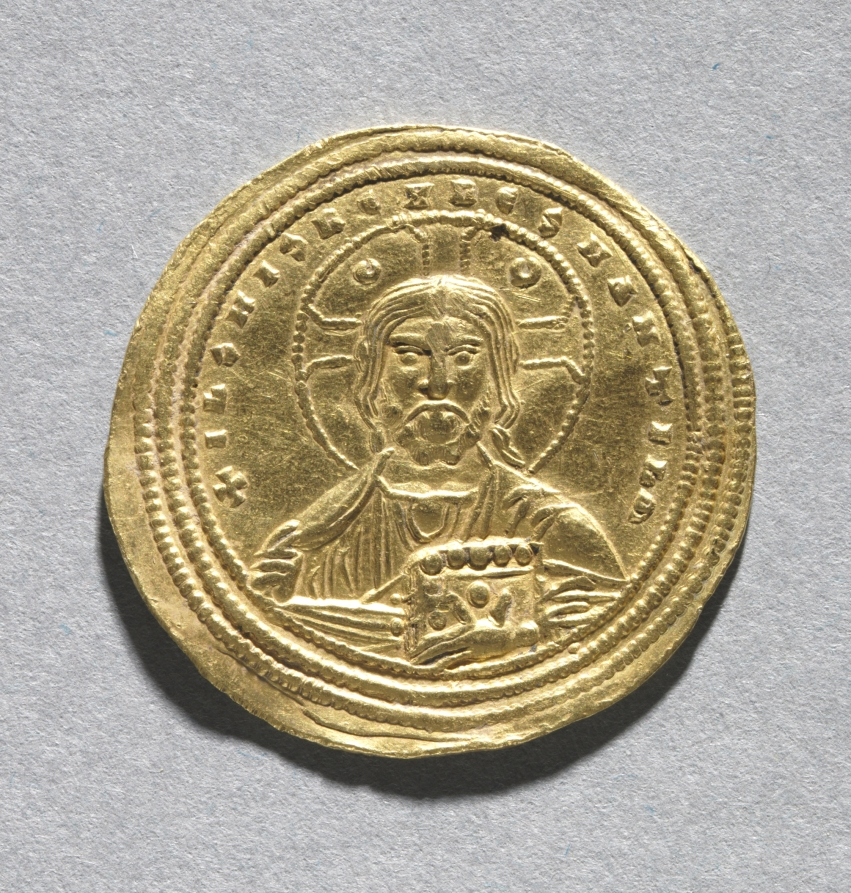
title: Nomisma with Basil II Bulgarotonos and His Brother Constantine VIII (obverse)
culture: Byzantium, Constantinople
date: 977–1025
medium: gold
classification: Coins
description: The vast number of surviving Byzantine coins attests to the level of trade across the empire. Controlled and supervised by the emperor, the producers of coins took care to represent his authority and reflect his stature. Talented artists were recruited to engrave the dies (molds) used for the striking of coins. Emperors increasingly came to include their heirs and co-emperors on their coinage, as well as other family members or even earlier rulers. Coins were recognized, then as now, as small, portable works of art. With their inscriptions and images, Byzantine coins provide valuable documentation of historical events and a record of the physical appearance of the emperors. The coins shown here include the solidus, the basic gold coin of 24 karats; the tremissis, a gold coin of one-third the weight and value of the solidus; and the nomisma, which in the 10th century replaced the solidus as the standard gold coin.